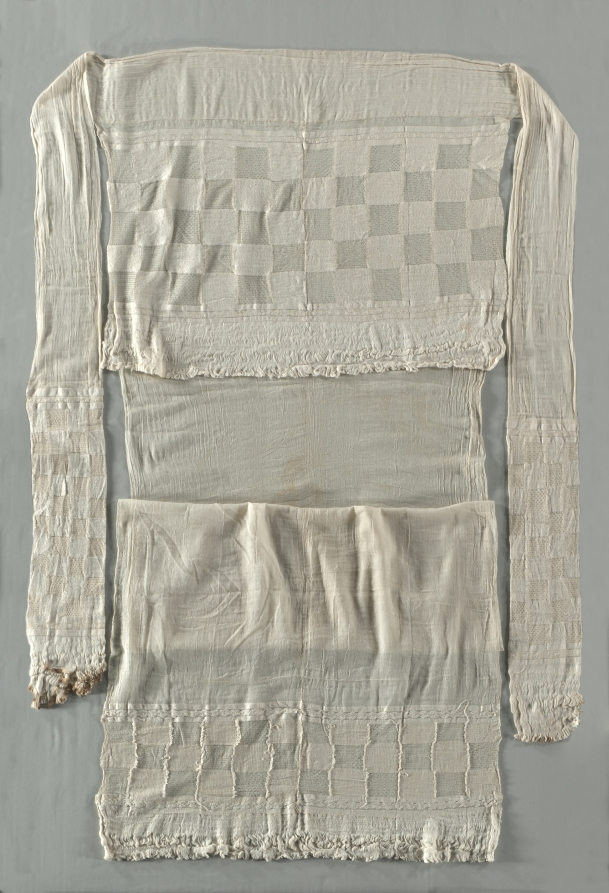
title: Loincloth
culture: Peru, North Coast, Chimú style, 1200–1460s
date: 1425–1500 (radiocarbon date, 92.3% probability)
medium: cotton; plain weave, brocaded and complex alternating gauze with 5 shots of plain weave between gauze shots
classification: Garment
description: Loincloths were basic men’s wear in ancient Peru. But the extraordinary size of some examples—this one is about eight feet long, unfolded—makes it difficult to know how they were worn, except that they were tied around the waist with the decorated panels hanging at the front and back of the body. The appearance may have been that of a billowing skirt.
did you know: This loincloth is huge!